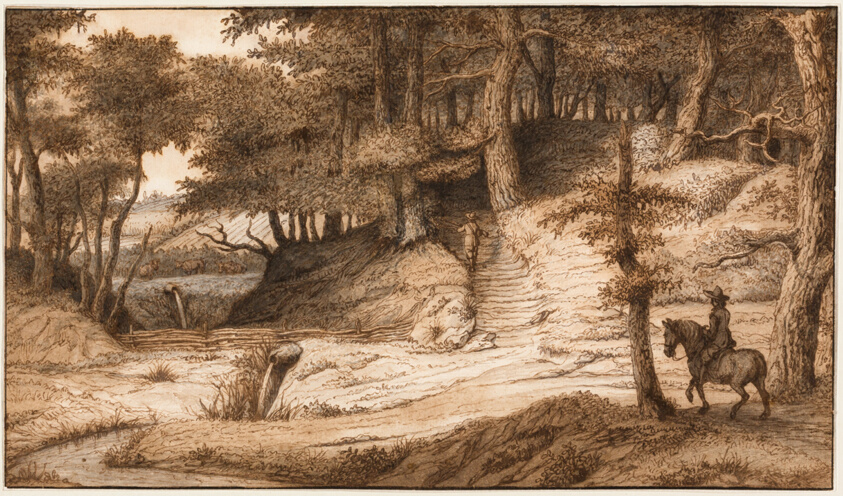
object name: Drawing and Watercolor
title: Horseman and Hunter in the Woods of Doorwerth, Near Arnhem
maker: Lambert Doomer (Dutch, 1624-1700)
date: c. 1670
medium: Pen and brown iron gall ink and brush and brown and gray washes, over black chalk, on ivory laid paper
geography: Netherlands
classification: drawings (visual works); prints and drawing